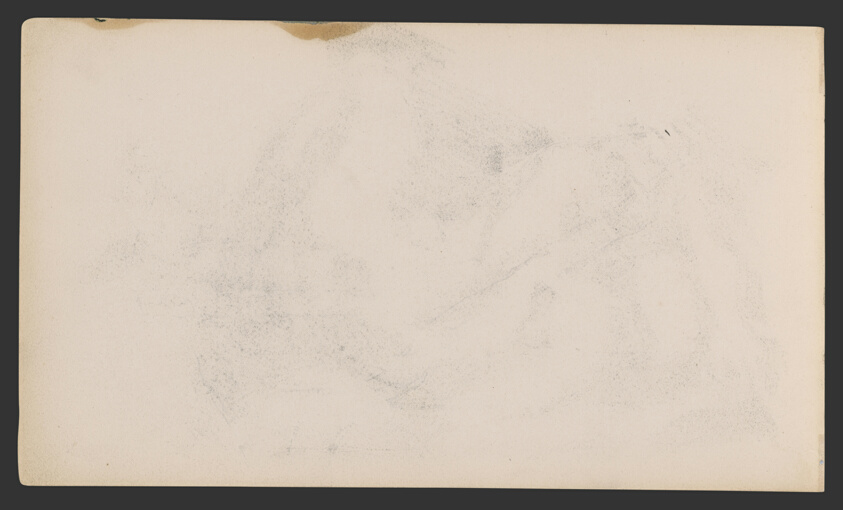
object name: Drawing and Watercolor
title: Sketchbook No. 2 (L'Estaque)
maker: Paul Cézanne; French, 1839-1906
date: 1875–86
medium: Graphite and pen and ink drawings on paper, bound into a book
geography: France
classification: sketchbook; graphite; prints and drawing; paper